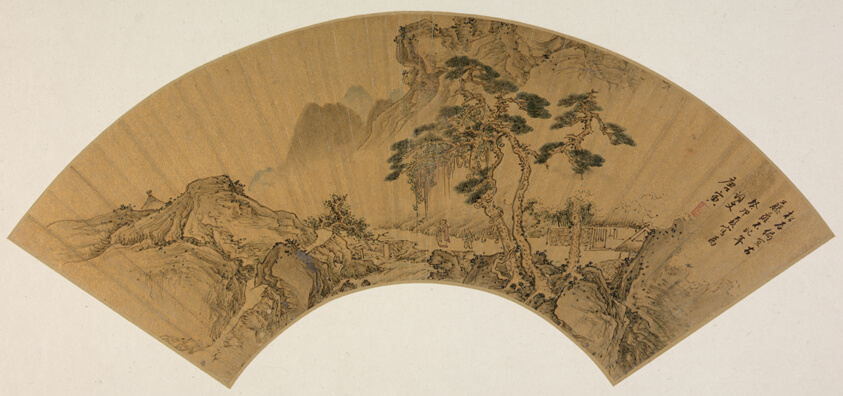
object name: Painting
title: The Gathering at the Orchid Pavilion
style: Chinese (culture or style)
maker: Attributed to Tang Yin 唐寅 (Chinese, 1470-1523)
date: Ming dynasty (1368–1644), 15th –16th century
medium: Folding fan mounted as an album leaf; ink and color on gold paper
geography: China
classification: album leaf; fan; painting; asian art